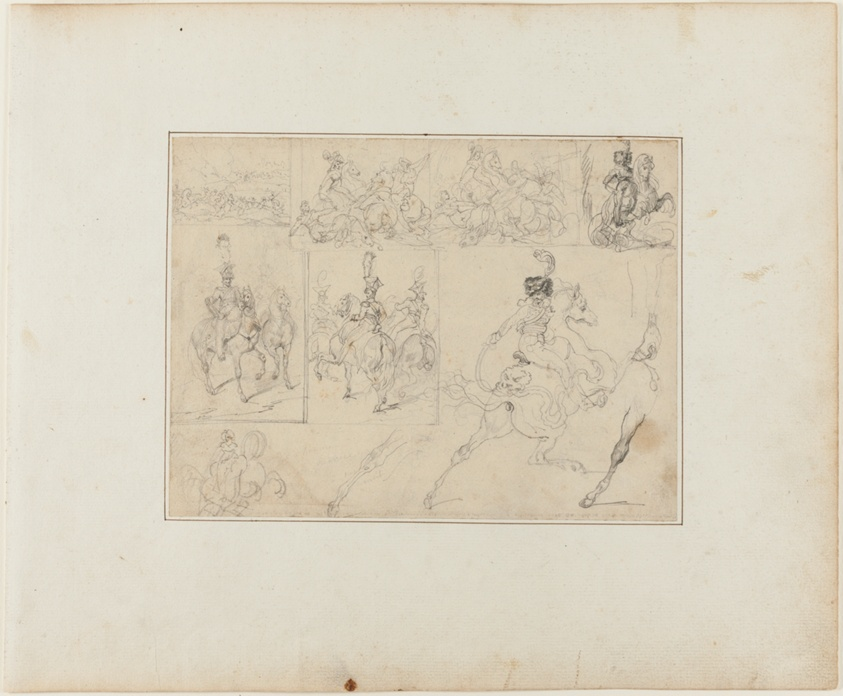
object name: Drawing and Watercolor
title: Sheet of Sketches: Cavalry Battles and Mounted Soldiers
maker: Jean Louis André Théodore Géricault (French, 1791-1824)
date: 1813/14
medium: Graphite, on tan wove paper, perimeter mounted on ivory laid paper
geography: France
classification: graphite; drawings (visual works); prints and drawing